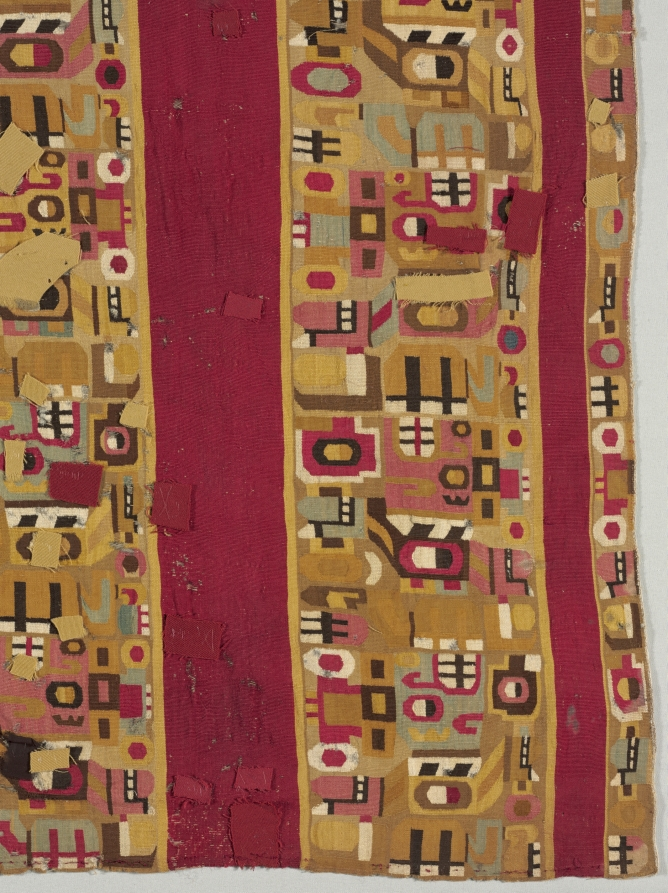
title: Tunic with Sacrificer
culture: South America, Peru, Central Andes, Middle Horizon, Wari people, 7th-11th century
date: 600–1000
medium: camelid-fiber, cotton; tapestry weave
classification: Textile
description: An extremely abstract supernatural sacrifice repeats in different colors and orientations across the body of this tunic, which was shortened on one side in antiquity. Look for the toothy black-and-white mouth in the sacrificer's upward-gazing head; other facial features include a button nose and a vertically divided eye. The figure holds the L-shaped haft of an axe behind its back and, at the front of its body, a short staff with a severed, upside-down human head on the top.